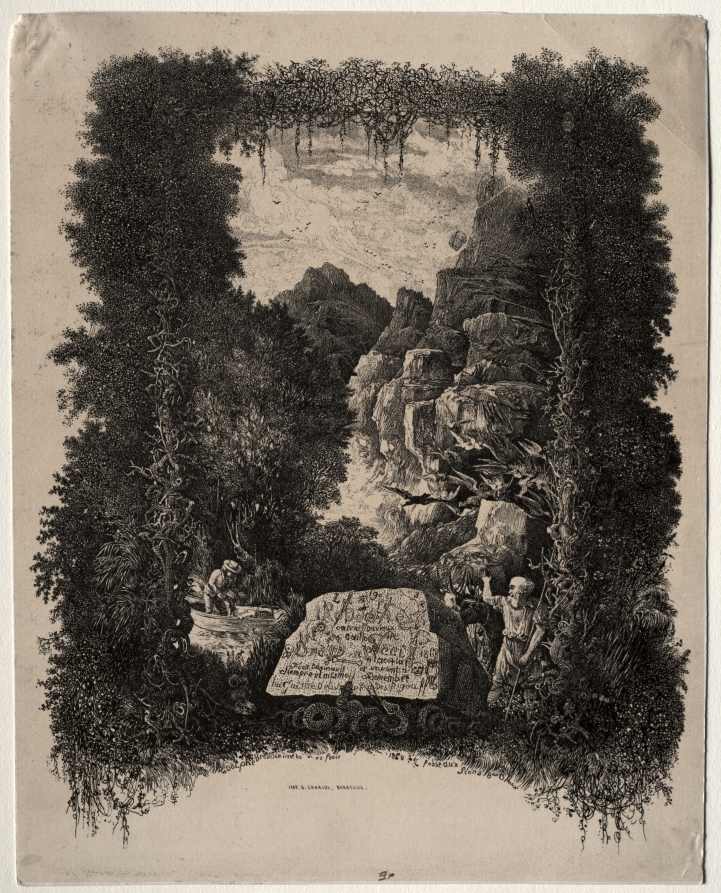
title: First frontispiece for Fables and Fairy-Tales by Thierry-Faletans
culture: France, 19th century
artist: Rodolphe Bresdin (French, 1822–1885)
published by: G. Chariol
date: 1868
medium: lithograph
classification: Print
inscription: lower left, in stone: Rodolphe Bresdin inv. et fecit; lower right, in stone: 1868 fosse aux lions Bordeaux; lower center, in stone: Imp. G. Chariol, Bordeaux